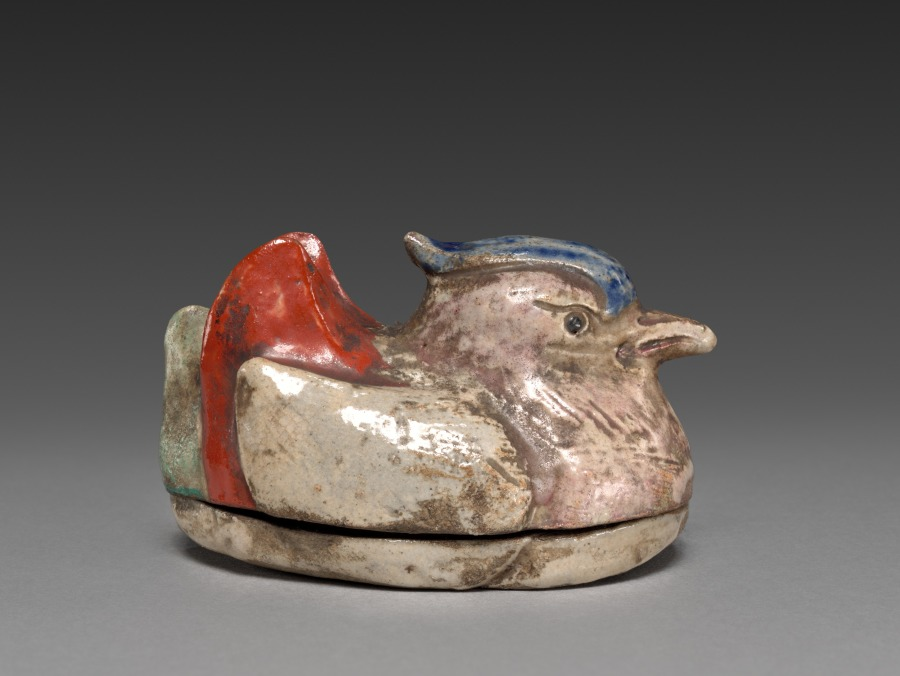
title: Incense Container (Kōgō) in the Shape of a Mandarin Duck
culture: Japan, Edo period (1615–1868)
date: c. 1700–1868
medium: Stoneware with glaze and incised decoration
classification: Ceramic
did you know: The artist incised the bird's feet on the bottom of the box.